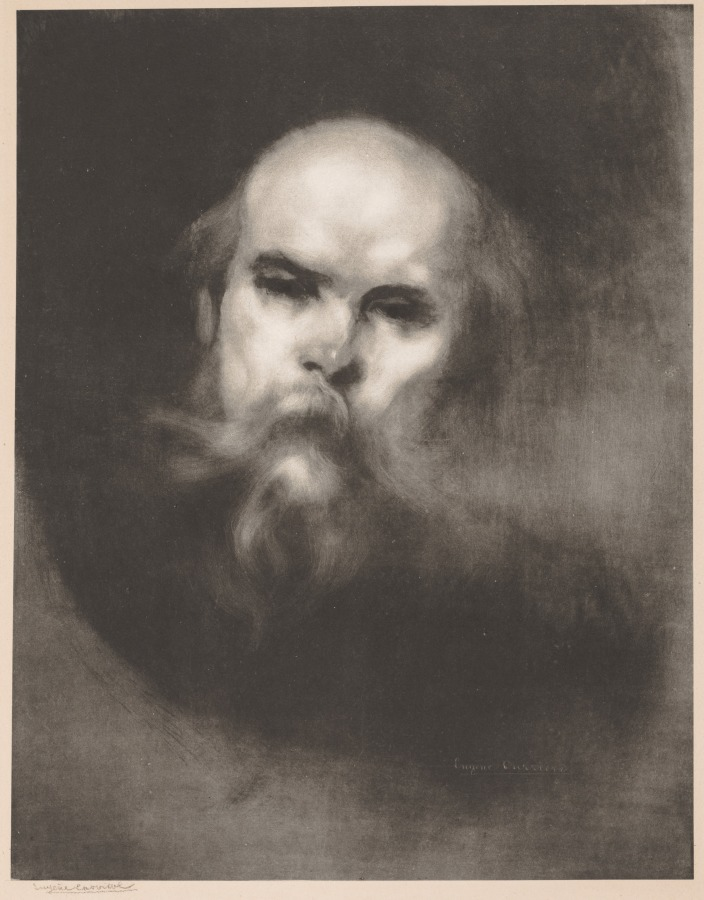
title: Paul Verlaine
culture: France, 19th century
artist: Eugène Carrière (French, 1849–1906)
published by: Lemercier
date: 1896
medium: lithograph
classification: Print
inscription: signed, lower right, in graphite: Eugène Carrière; signed, lower right, in stone: Eugène Carrière